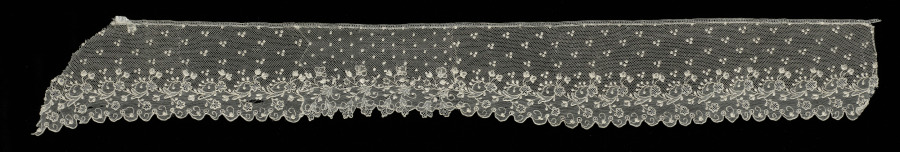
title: Lace Edging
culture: France, Alençon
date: 1700s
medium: Needle lace (Point d'Alençon)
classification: Lace